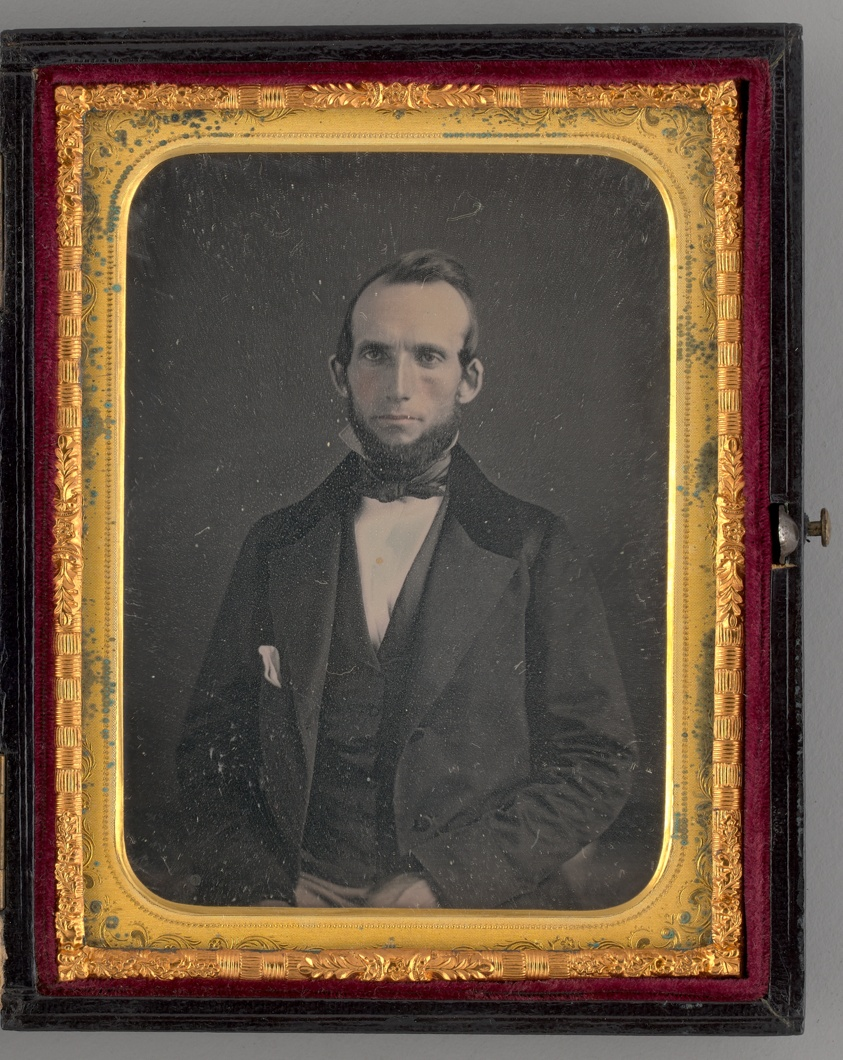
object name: Photograph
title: Untitled (Portrait of a Seated Man)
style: 19th century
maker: Mathew B. Brady; American, 1823–1896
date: 1862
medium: Daguerreotype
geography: United States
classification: portrait; photograph; photographic process; photography; portrait; daguerreotype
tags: lundberg collection, portrait, Male, men, portraits: male subject, photography, portraits